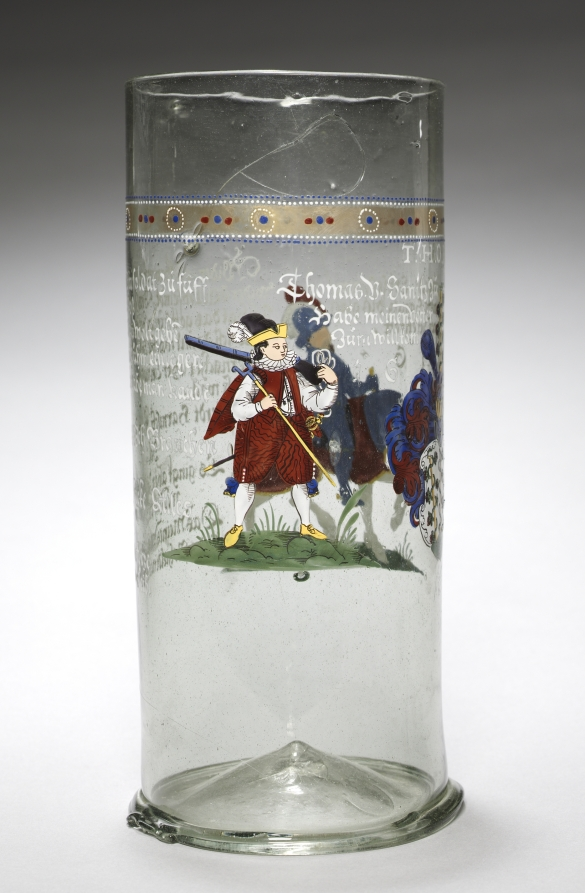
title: Beaker ("Welcome Glass") with Arms and Inscriptions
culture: Germany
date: 1616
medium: enameled glass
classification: Glass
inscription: THOMAS V. SANITZ ZU BRAUSZFELDE ERBSESSENN HABE MEINEN VETTER HANS V. SANITZ DISZ GLASZ ZUM WILLKOMMEN VEREHRETT. (Thomas von Sanitz has given this glass to my cousin, Hans von Sanitz, in welcome.)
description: The inscription tells that this beaker was given by Thomas V. Sanitz zu Brausfelde Erbsessen to welcome his cousin Hans V. Sanitz.